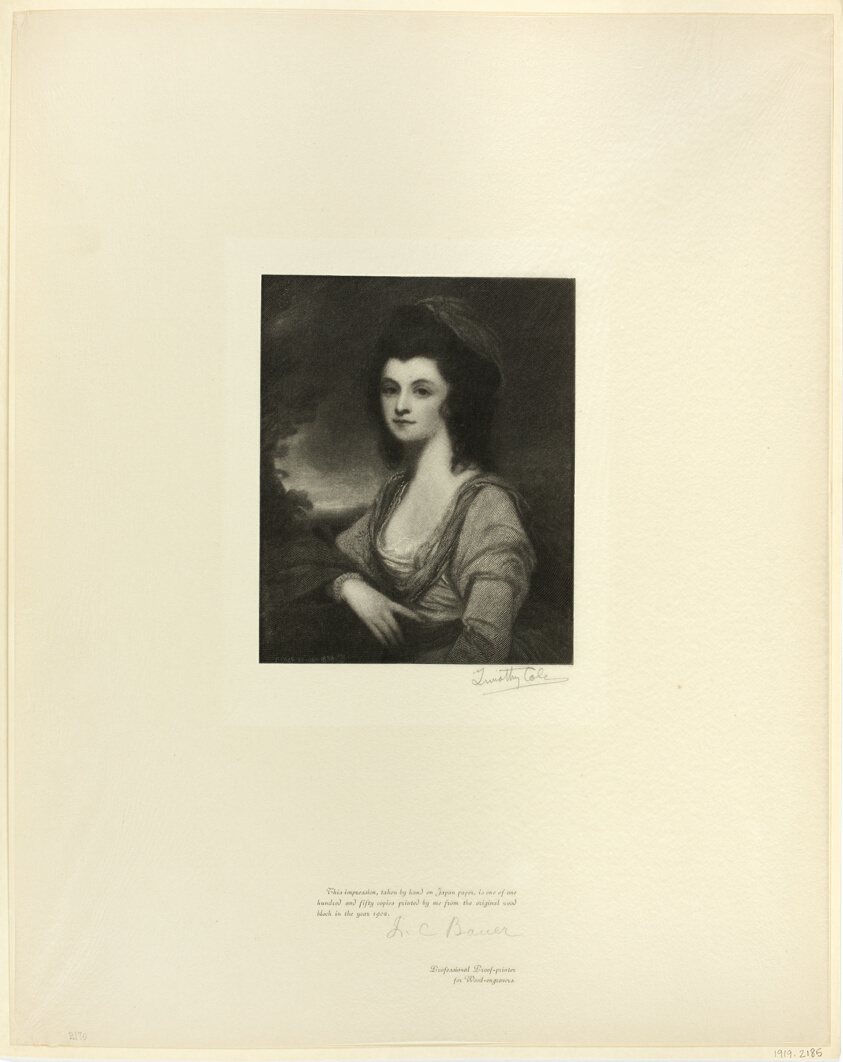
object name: Print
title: Portrait of Mrs. Davies, from Old English Masters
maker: Timothy Cole (American, born England, 1852-1931); after George Romney (English, 1734-1802)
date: 1898, printed 1902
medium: Wood engraving on chine paper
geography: United States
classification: wood engraving; print; prints and drawing